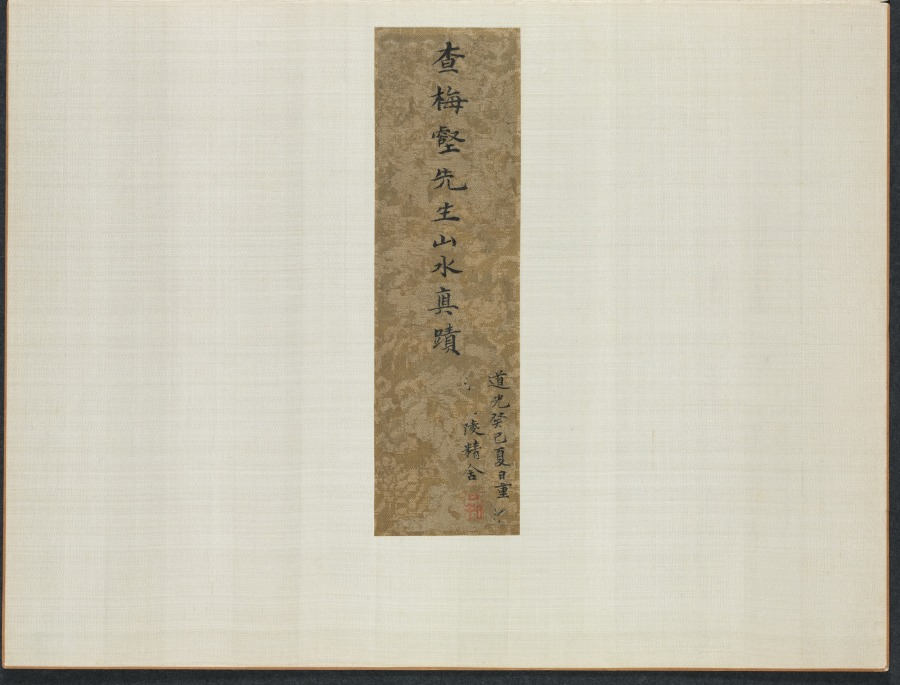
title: Album of Seasonal Landscapes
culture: China, Qing dynasty (1644-1911)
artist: Zha Shibiao (Chinese, 1615–1698)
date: 1684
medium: Album of twelve leaves; ink or ink and light color on paper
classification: Painting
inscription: Artist's inscriptions, signatures, and 16 seals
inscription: 2 colophons and 12 additional seals: 1 colophon and 1 seal of Ma Yueguan 馬曰琯 (1688–1755); 1 colophon, dated 1759, and 1 seal of Huang Cou 黃湊; 2 seals of Liu Haisu 刘海粟 (1896-1994)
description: Zha Shibiao, a native of Anhui province, moved to Yangzhou later in his career, like so many of his fellow countrymen. At age 68, he painted this album with seasonal landscapes in various styles. Painted in fresh colors and wet strokes, all depict typical scenes of Jiangnan, the Yangzi delta: a herdboy on a buffalo wading through water, boating on the stream to the Peach Blossom Spring at Wulin, a waterfront town shrouded in mist, a scholar on his donkey enjoying the red autumn leaves, and drinking tea on a boat while watching migrating birds.